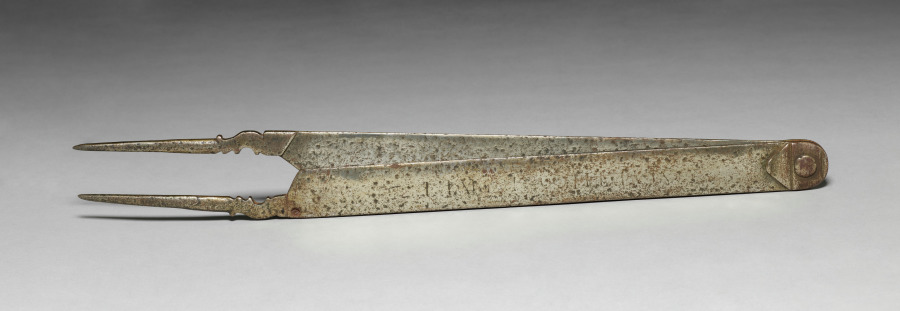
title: Dividers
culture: Germany or France, 17th century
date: 1600s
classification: Tool